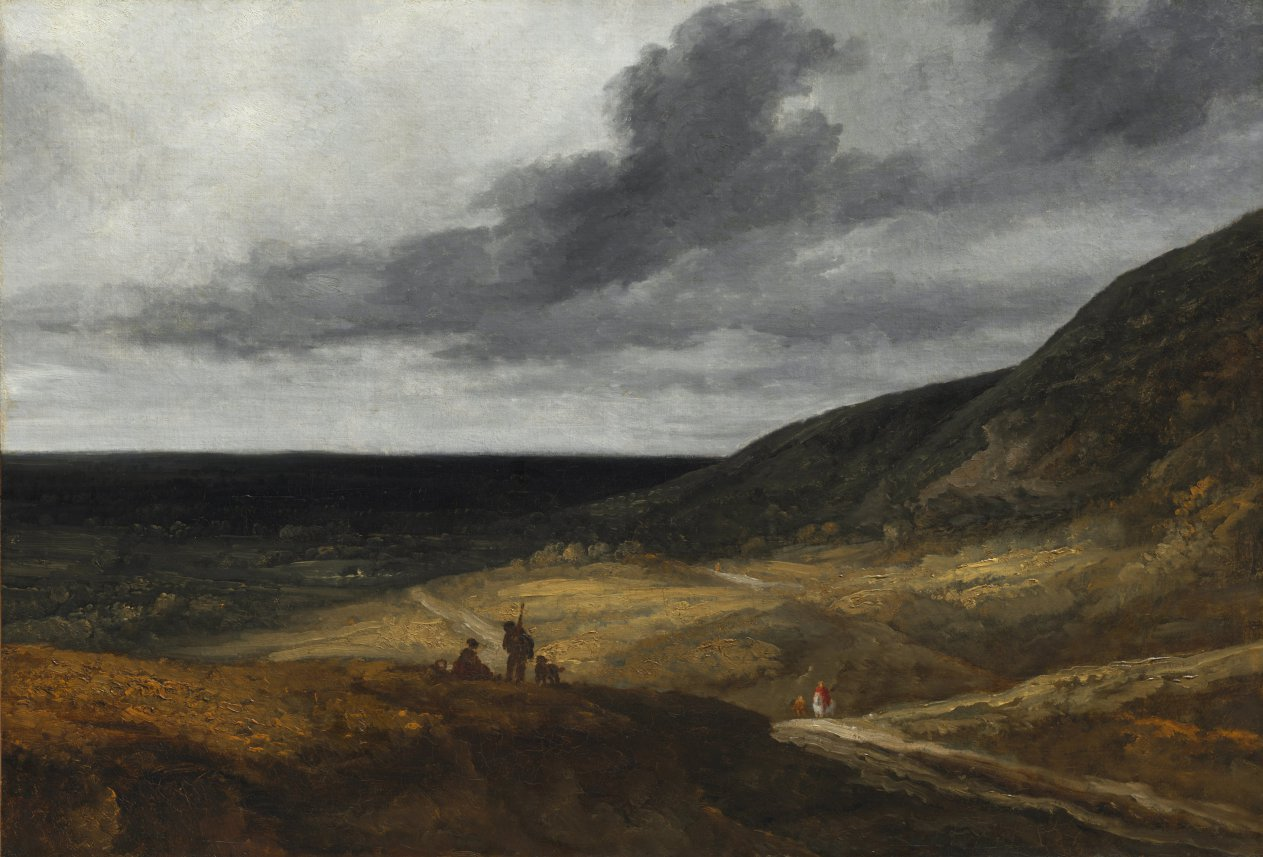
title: Landscape Near Paris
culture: France, 19th century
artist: attributed to Georges Michel (French, 1763–1843)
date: c. 1840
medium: oil on fabric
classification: Painting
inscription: Formerly signed and dated lower left (according to Minneapolis Institute of Arts, see note 2)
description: The location of this scene, probably near Paris, has not been identified with certainty. Unlike most painters of this time, Michel never traveled to Italy and focused only on depicting locations in France. Michel was always interested in Dutch art, however, and was nicknamed the "French Ruisdael"-a reference to the 17th-century Dutch landscape painter Jacob van Ruisdael (1628-1682). After about 1808, Michel explored personal interpretations of landscape, focusing on light, sky, and space. The brooding, vaguely threatening atmosphere in this painting embodies the Romantic notion that human beings are insignificant relative to the larger forces of nature.